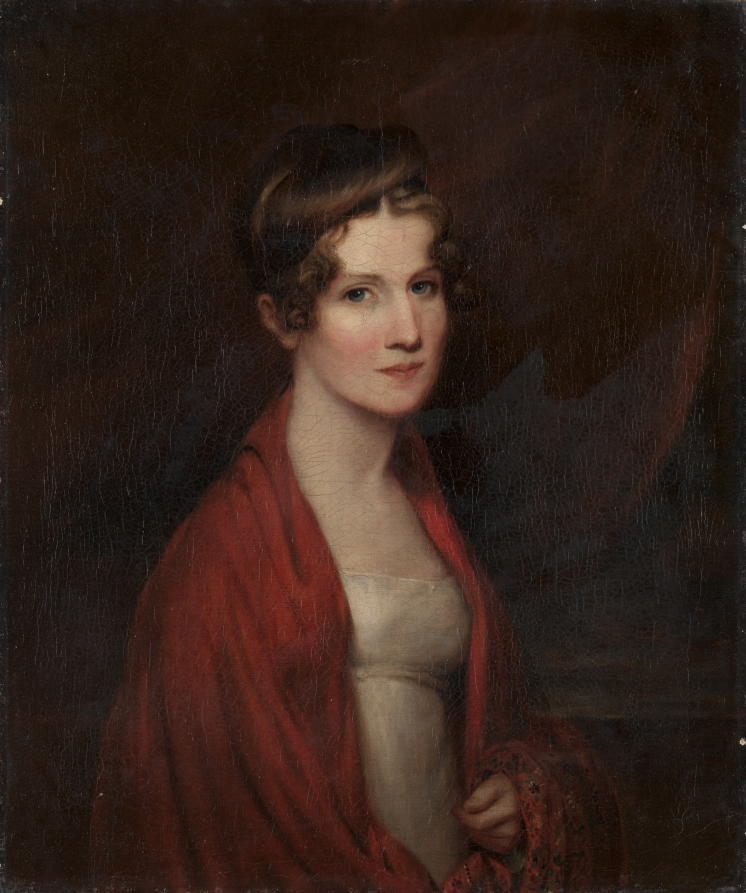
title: Mary Fairlie Cooper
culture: America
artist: William Dunlap (American, 1766–1839)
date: probably 1810s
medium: oil on canvas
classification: Painting